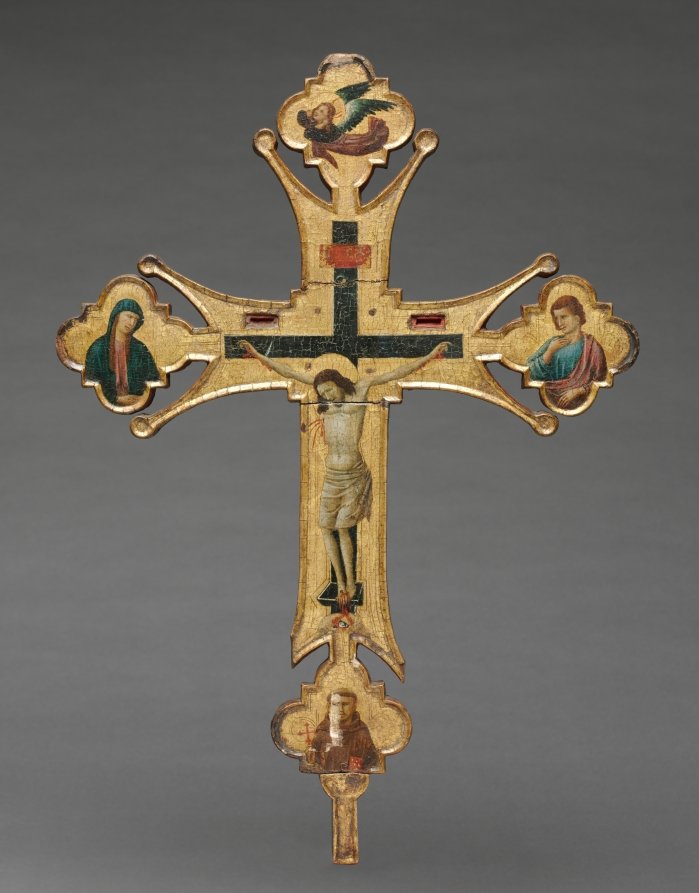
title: Processional Cross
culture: Italy, Umbria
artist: Master of Santa Chiara (Italian)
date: c. 1320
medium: oil on canvas on wood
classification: Painting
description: This cross was originally mounted on a tall pole and carried in religious processions. Therefore, the figures on each side are almost identical. In the center is Christ crucified. Looking on from the elaborate terminals at left and right are the Virgin and Saint John. The bottom terminal shows a different saint on each side: Saint Francis on one and Saint Clare on the other. At the top of each side is an angel. Although one angel looks up and the other down, both express intense grief in their faces and gestures. The Master of Santa Chiara is the name given to this unknown artist who painted this and several other works in Assisi. In that city, Saint Francis founded an order of friars while Saint Clare established a counterpart for women called the Poor Clares. The presence of both saints on this cross suggests that it was made for one of Assisi's Franciscian institutions.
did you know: This cross is painted on both sides so that while being carried in a procession the images are visible to a crowd; both sides are not quite identical.